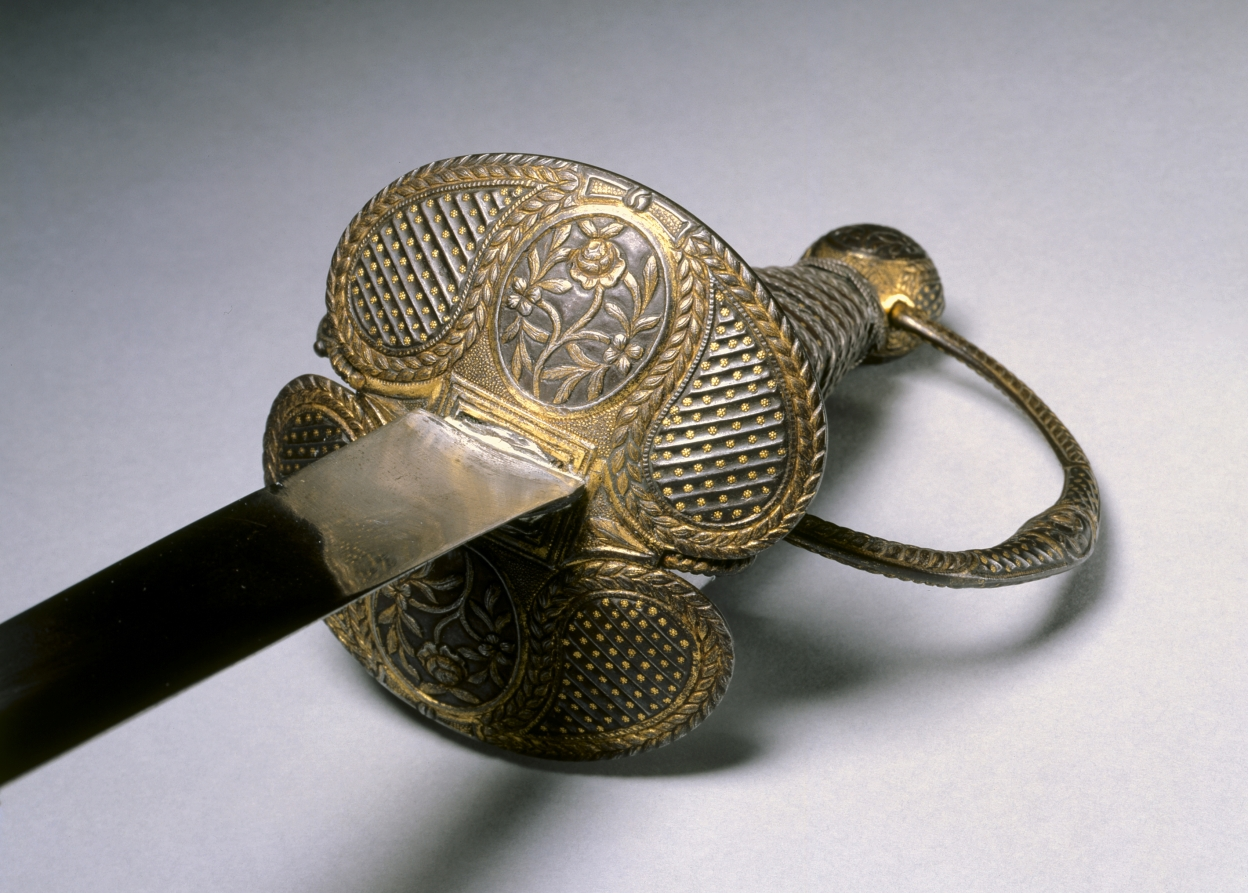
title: Small Sword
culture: France, Paris (?), 18th century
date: c. 1780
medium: forged steel blade; partially gilt and russet steel hilt; steel wire, leather bands, wood core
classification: Arms and Armor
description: During the 1700s, the small-sword emerged as a light, quick weapon. Like the rapier it was carried by unarmored civilians, the noblemen of the upper classes. Over time this delicate sword became more an accessory of male attire than a weapon essential to life and death. The sword hilt, which shows even when the blade is sheathed, became the ground for elaborate decoration. These small-swords thus represent the final stage in the evolution of the sword, from the edged weapons of antiquity to the elegantly refined blades of the 1700s and 1800s.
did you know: The fashion among gentleman for wearing small-swords with everyday attire began to wane by the end of the 1700s with the exception of the military dress sword.